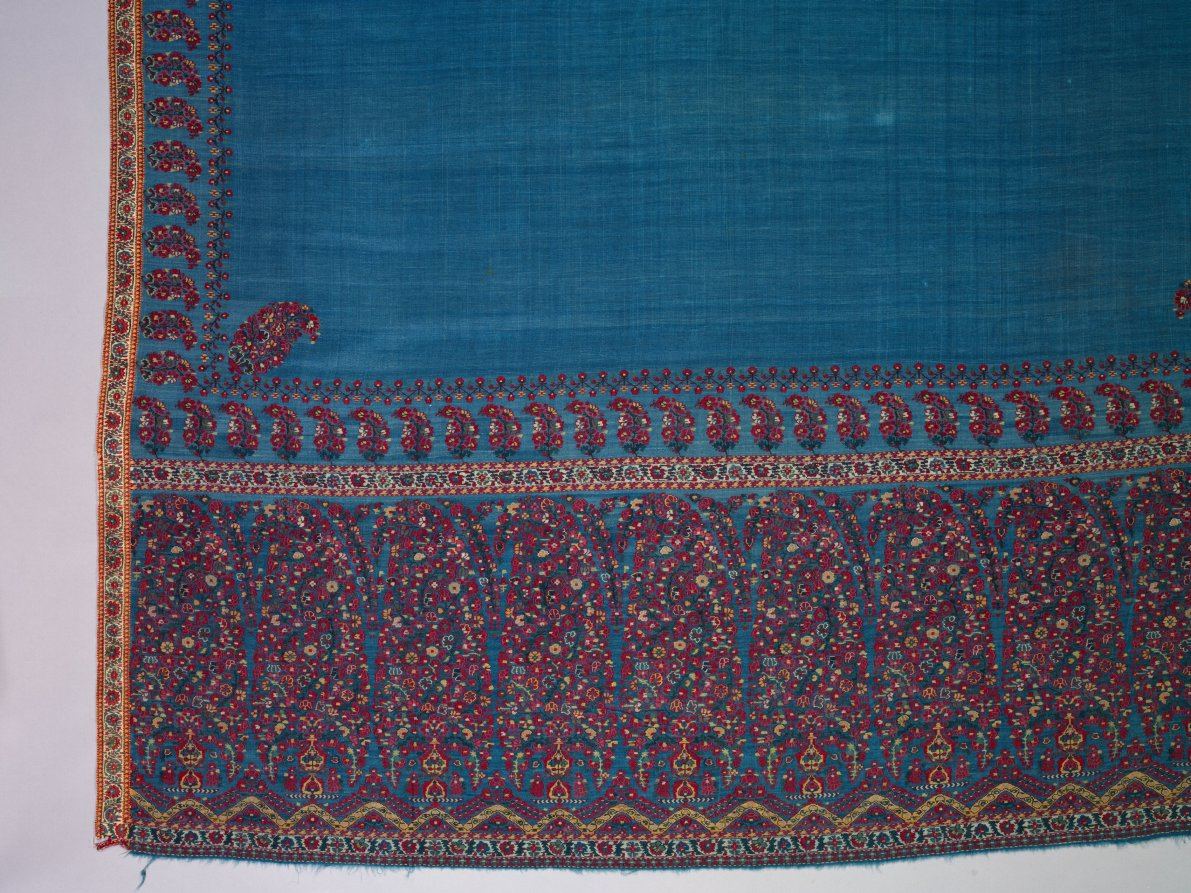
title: Shawl with boteh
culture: India, Kashmir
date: 1820–1830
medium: 2/2 twill tapestry weave, double interlocked: wool, possibly pashmina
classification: Textile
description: Thousands of luxurious shawls imported from Kashmir, India, were status symbols that European-manufactured imitations could not equal. Those woven in Paisley, Scotland, gave rise to the popular term paisley. Their representation in portraits records the evolution of shawl fashions, which helps to date surviving examples. The coveted quality of Kashmir shawls was achieved with luxurious fine goat hair woven in twill tapestry to form small colorful blossoms. Such shawls are lightweight, supple, and warm. A plethora of blossoms arranged in small vases on stands form the large paisley or boteh motifs, while smaller versions enliven the sides of the field. Such floral displays evolved from blossoming plants possibly in 16th-century India.